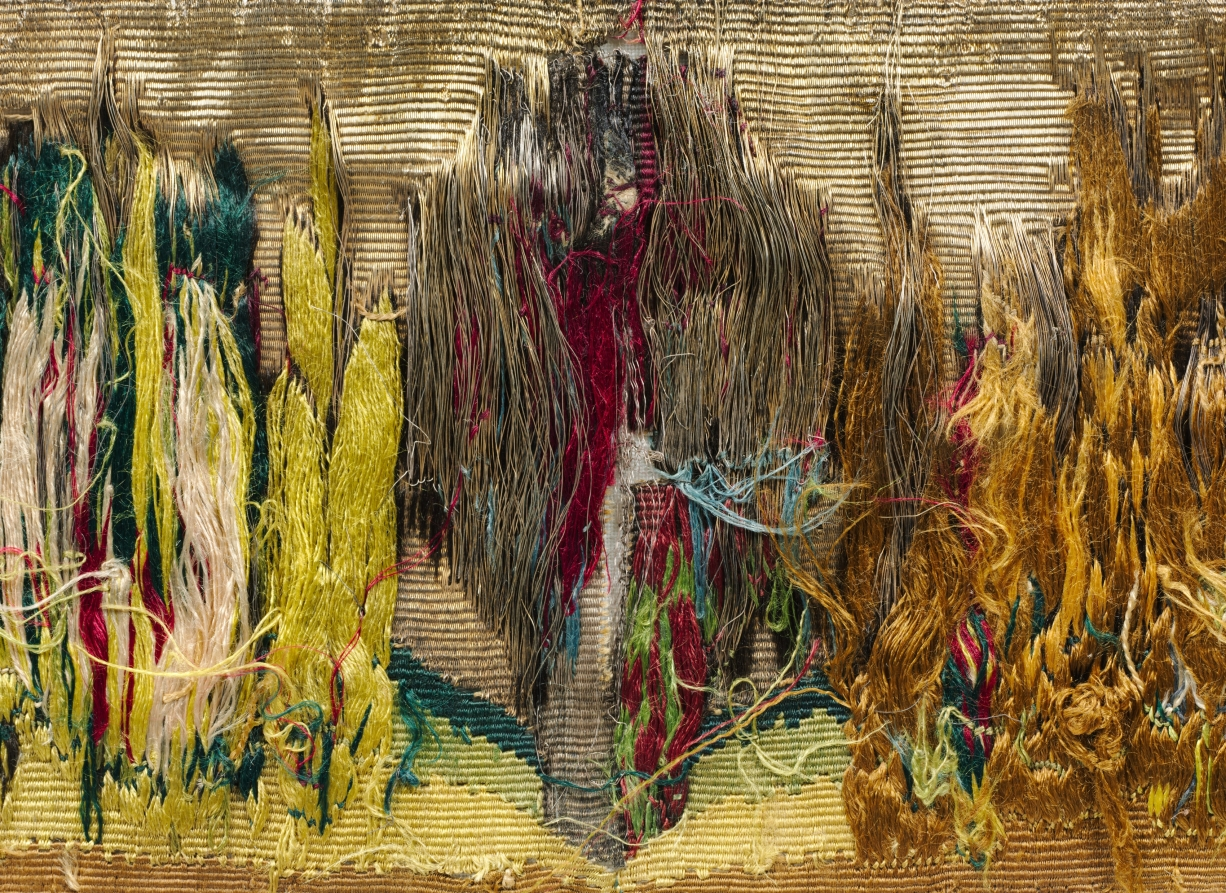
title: Tapestry Border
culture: Italy, Lombardy, Milan ?, first half of 15th century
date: 1400–1450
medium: tapestry weave; silk, silver and gold wire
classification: Tapestry